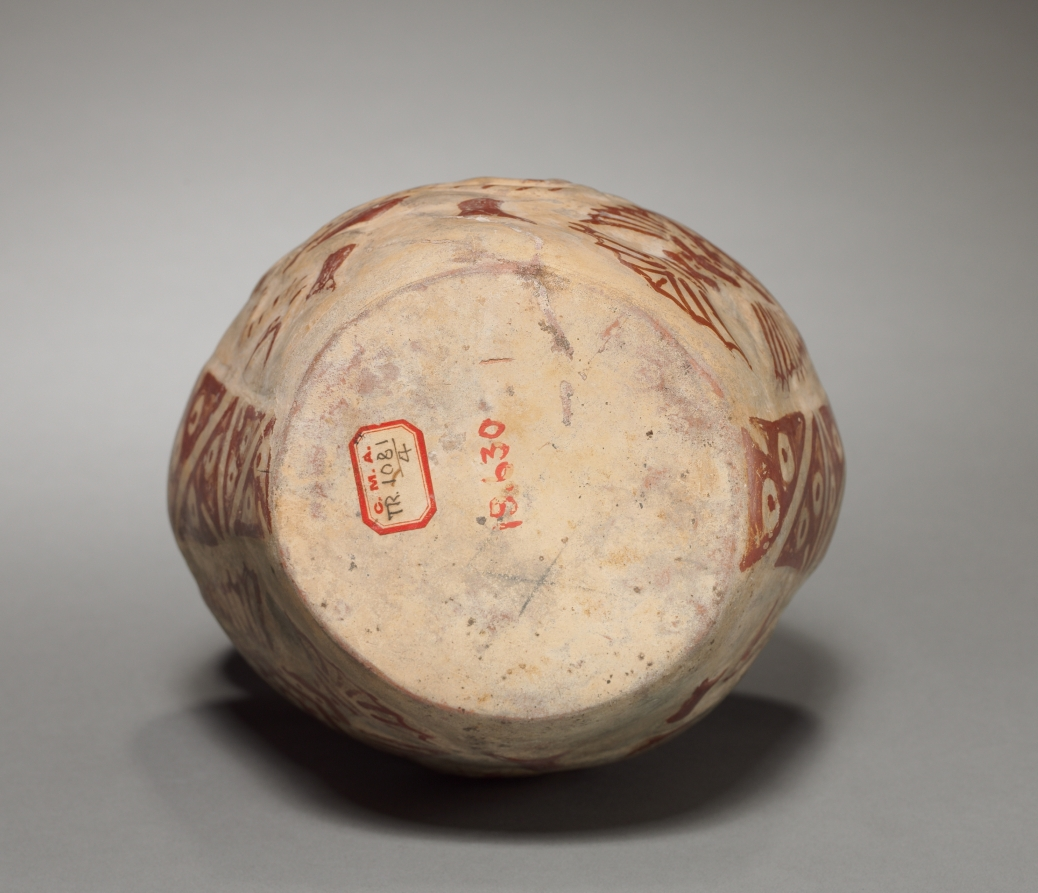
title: Bottle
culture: Peru, Chimú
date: c. 300–500 CE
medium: pottery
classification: Ceramic